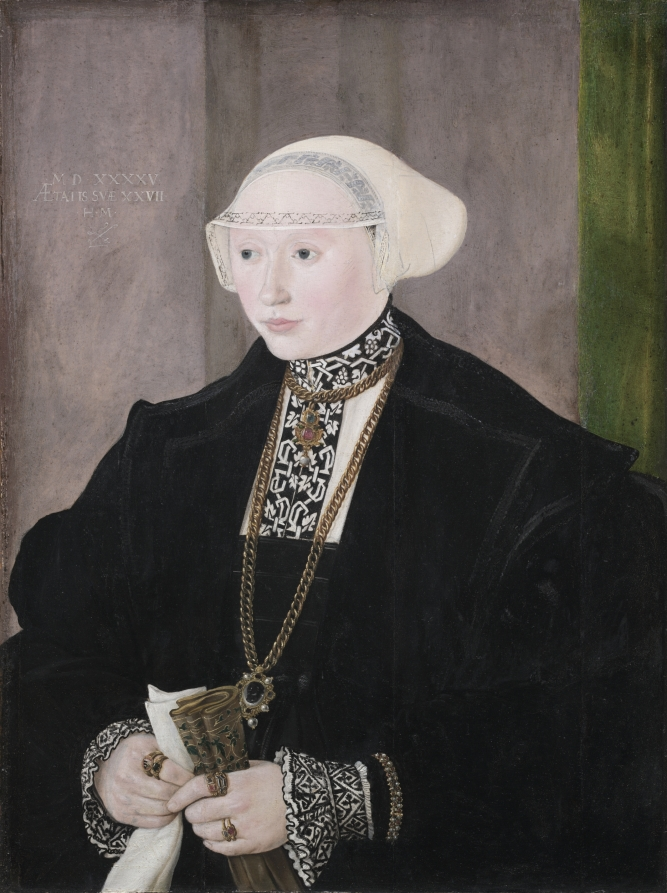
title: Portrait of Maria Kitscher, Frau von Freyberg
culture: Germany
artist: Hans Mielich (German, 1516–1573)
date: 1545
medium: oil on wood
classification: Painting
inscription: Signed upper left: "M.D. XXXXV. / AETATIS SUAE XXVII. / .H.M."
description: Maria von Freyberg was in the court of Albert V, Duke of Bavaria. However, as Lutherans, the family eventually fell from favor as Catholic political interests consolidated power in Bavaria. Mielich’s work for the Munich court included illustrating an inventory of the duchess’s jewelry, seen in the meticulous attention here to the sitter’s brooches, necklaces, and rings. The diamond and ruby ring on her left index finger would have slid apart to reveal a private message or image underneath the gems.